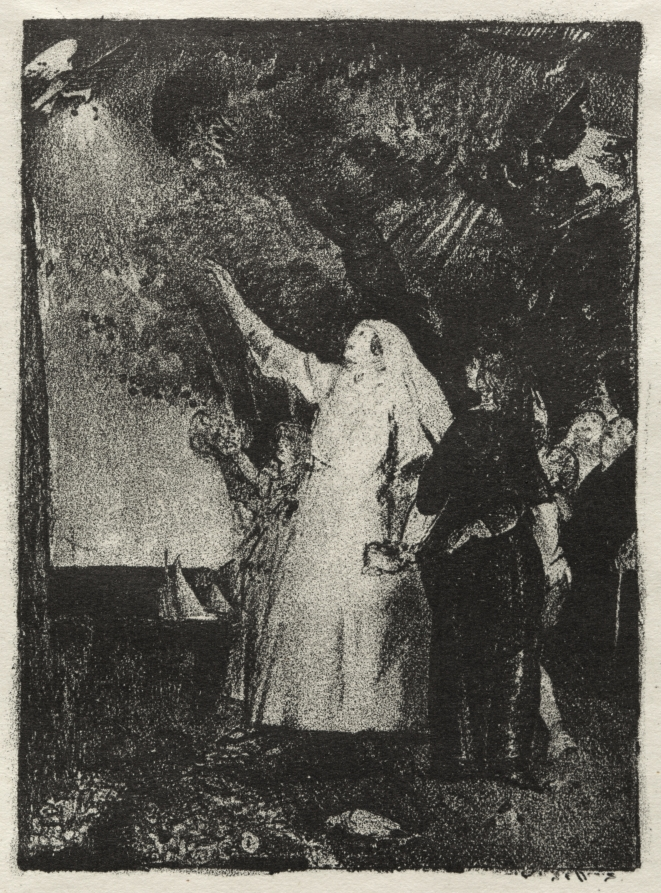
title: Hail to Peace, Christmas 1918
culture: America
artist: George Bellows (American, 1882–1925)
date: 1919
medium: lithograph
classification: Print